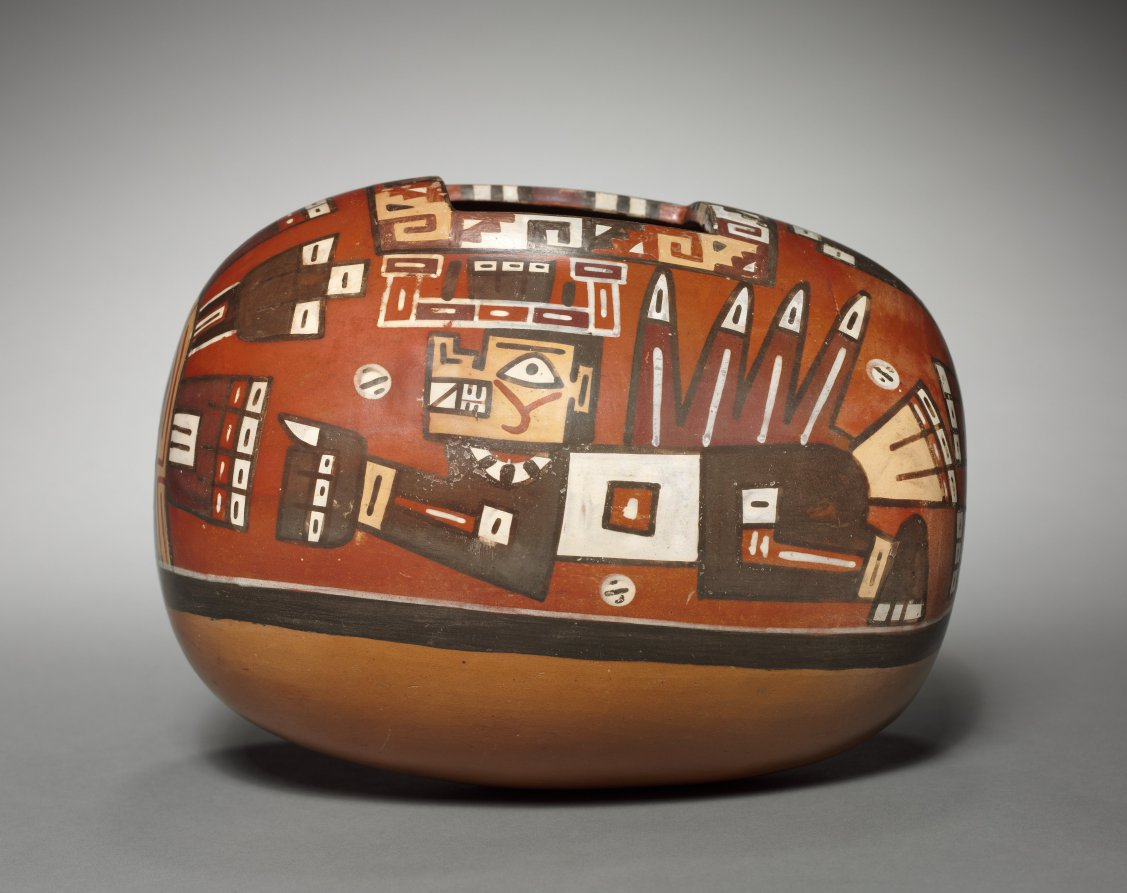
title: Container with Deity Head and Winged Attendants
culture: Central Andes, central coast, coastal Wari style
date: 600–1000 (Thermoluminescence date, 730–1190)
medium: ceramic and slip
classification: Ceramic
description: The head of the staff deity, the most important supernatural being depicted in Wari art, appears on the ends of this container, the function of which is mysterious. The sides feature two of the deity's attendants, each with a wing and N-shaped fangs drawn from the animal world. One of these creatures carries a staff, a supreme symbol of divine authority and power.